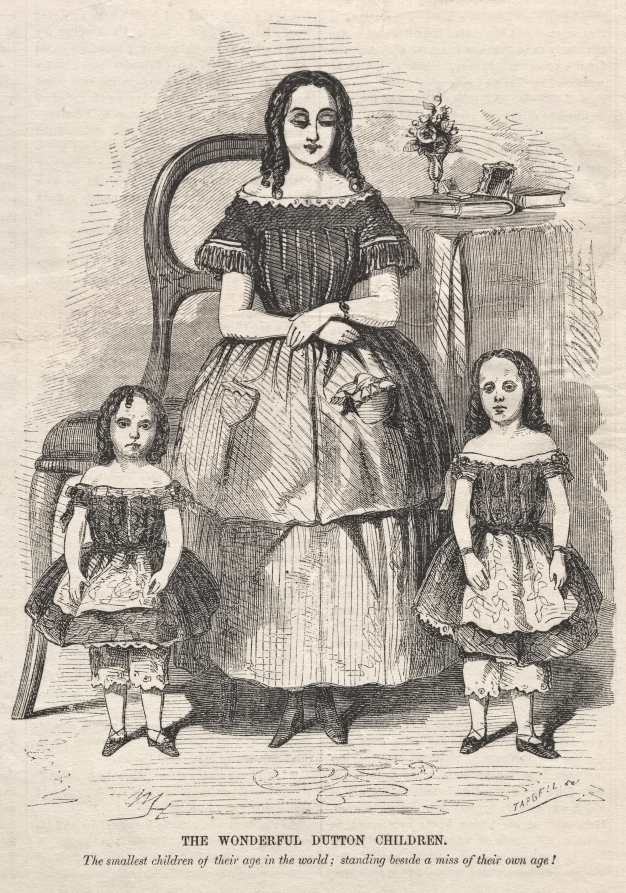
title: The Wonderful Dutton Children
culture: America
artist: Winslow Homer (American, 1836–1910)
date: 1859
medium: wood engraving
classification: Print